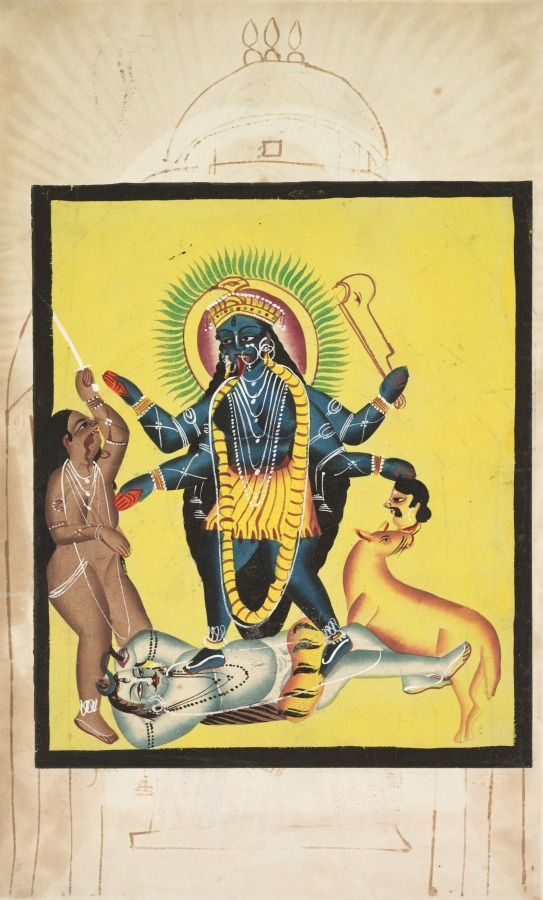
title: Kali Standing on Shiva (verso), from a Kalighat album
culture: Eastern India, Bengal, Kolkata, Kalighat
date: c. 1890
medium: Gum tempera, graphite, and ink on paper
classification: Painting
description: Black-skinned, four-armed, her tongue out, and blood dripping from her mouth, Kali has a third eye—representative of enlightened or divine knowledge—on her forehead. Simultaneously benevolent and dangerous, she holds a sword and a demon’s severed head in two hands while the other two hands are in gestures of protection and blessing. This image would have been sold as a pilgrim souvenir to both locals and the colonial British around the Kalighat temple and is a replica of the image worshipped inside the temple. The frightening image of Kali especially fit into the colonial imagination and into Victorian popular culture and would have been an iconic souvenir/artifact to be shown to intrigued and horrified friends at home in England.